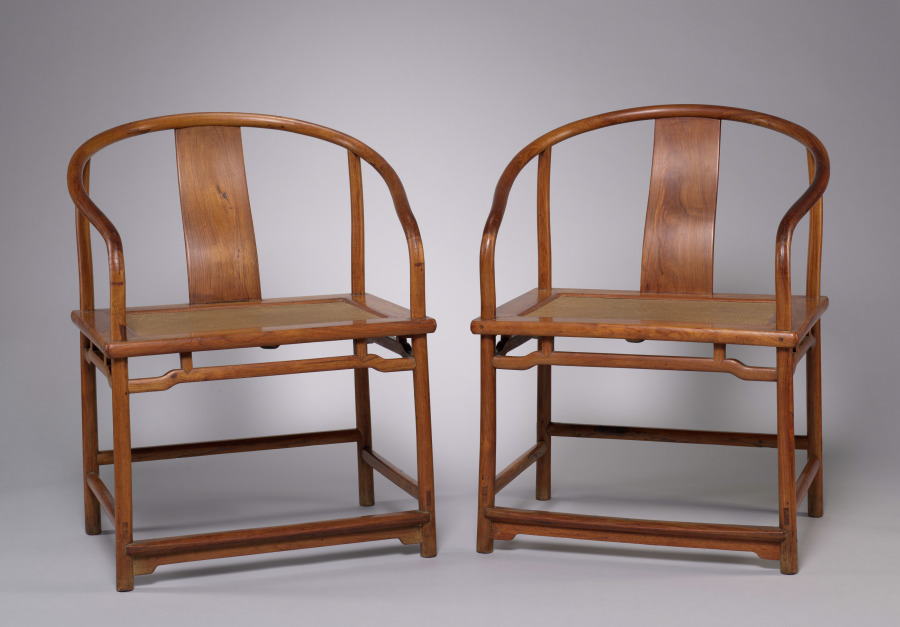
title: Pair of Roundback Armchairs: Lohan Type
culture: China, Ming dynasty (1368–1644) to Qing dynasty (1644–1911)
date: 1600–1700s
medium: Rosewood (huanghuali)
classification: Furniture and woodwork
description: In history, China moved from an original floor culture to high chairs and tables, developing a unique tradition of craftsmanship. Although still relatively unexplored, the manufacturing and styles of furniture differ by region. These horseshoe-back armchairs were made in Jiangsu province. Their simplicity and minimalist elegance are characteristic of Suzhou-style furniture and aesthetics. The backs of the chairs are made of seven pieces of wood, joined and secured with an inserted wooden pin, a mortise-tenon technique that appeared in its earliest form in Neolitihic fragments of the Hemudu culture.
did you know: The existence of such chairs in pairs suggests that they were used in more formal settings reserved for important guests and family members of age and high status.